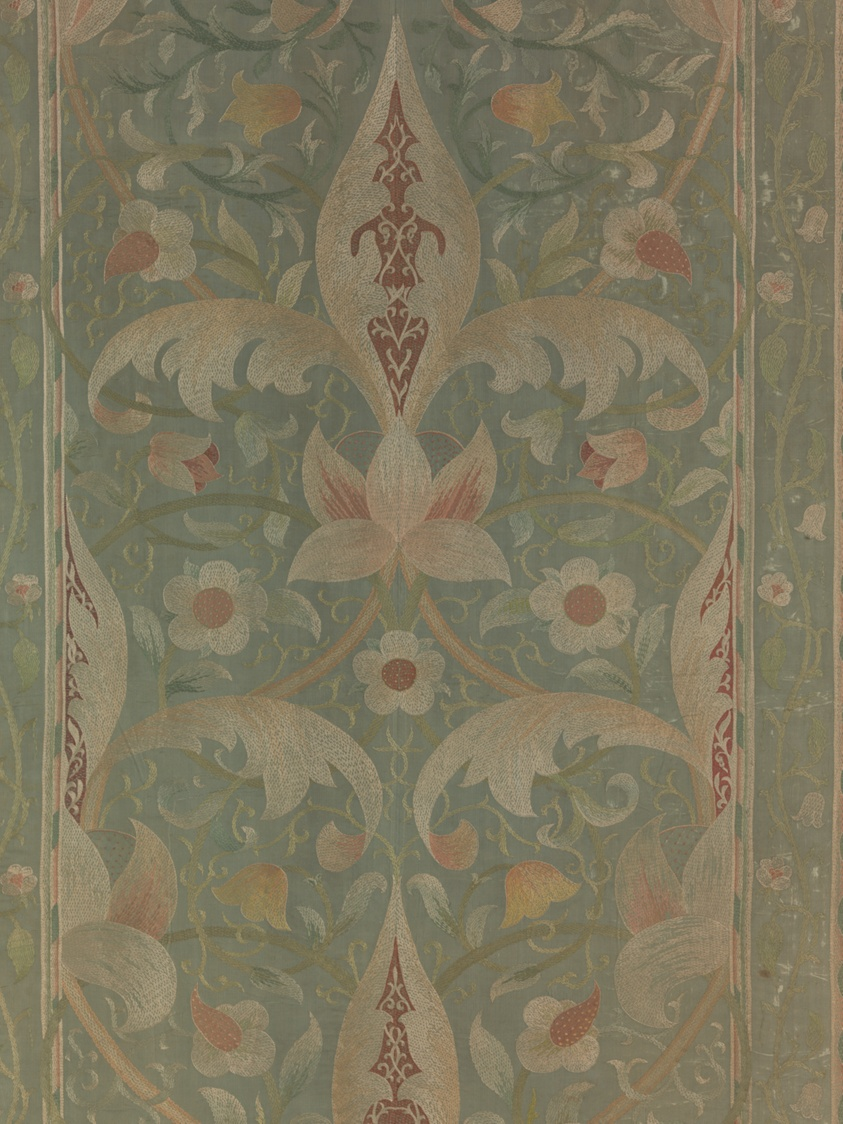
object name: Textile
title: Lotus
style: Arts and Crafts Movement, british, 19th century, British Arts and Crafts Movement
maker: Design attributed to May Morris (English, 1862–1938); Produced by Morris & Co., London (English, 1875–1940); Embroidered by the Decorative Arts Society, Chicago (American, founded 1877)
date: Design by 1888, made 1888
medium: Silk, warp-float faced twill weave; embroidered in satin and stem stitches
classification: textile; needlework (visual works)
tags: floral, lotus